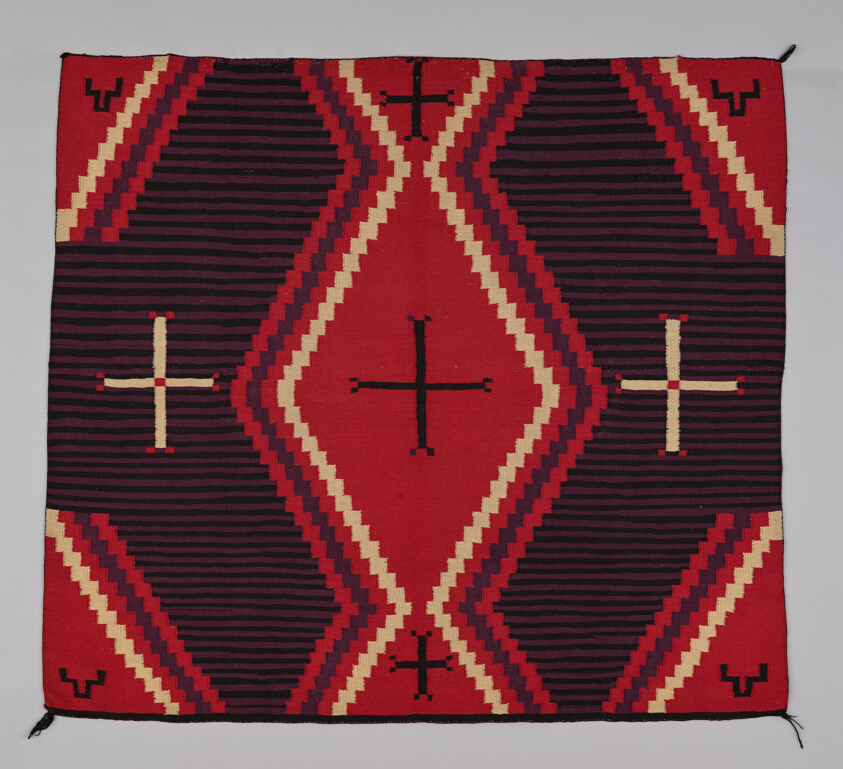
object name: Textile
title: Chief Blanket (Third Phase)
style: navajo, dine, Arts of the Americas, indigenous, north american, native american, native north american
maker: Navajo (Diné) (Arizona, New Mexico, and Utah, United States)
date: c. 1880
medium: Wool, dovetail tapestry weave with "lazy lines"; twined warp ends and selvages; corner tassels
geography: New Mexico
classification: blanket (covering); wool; art of the americas; textile